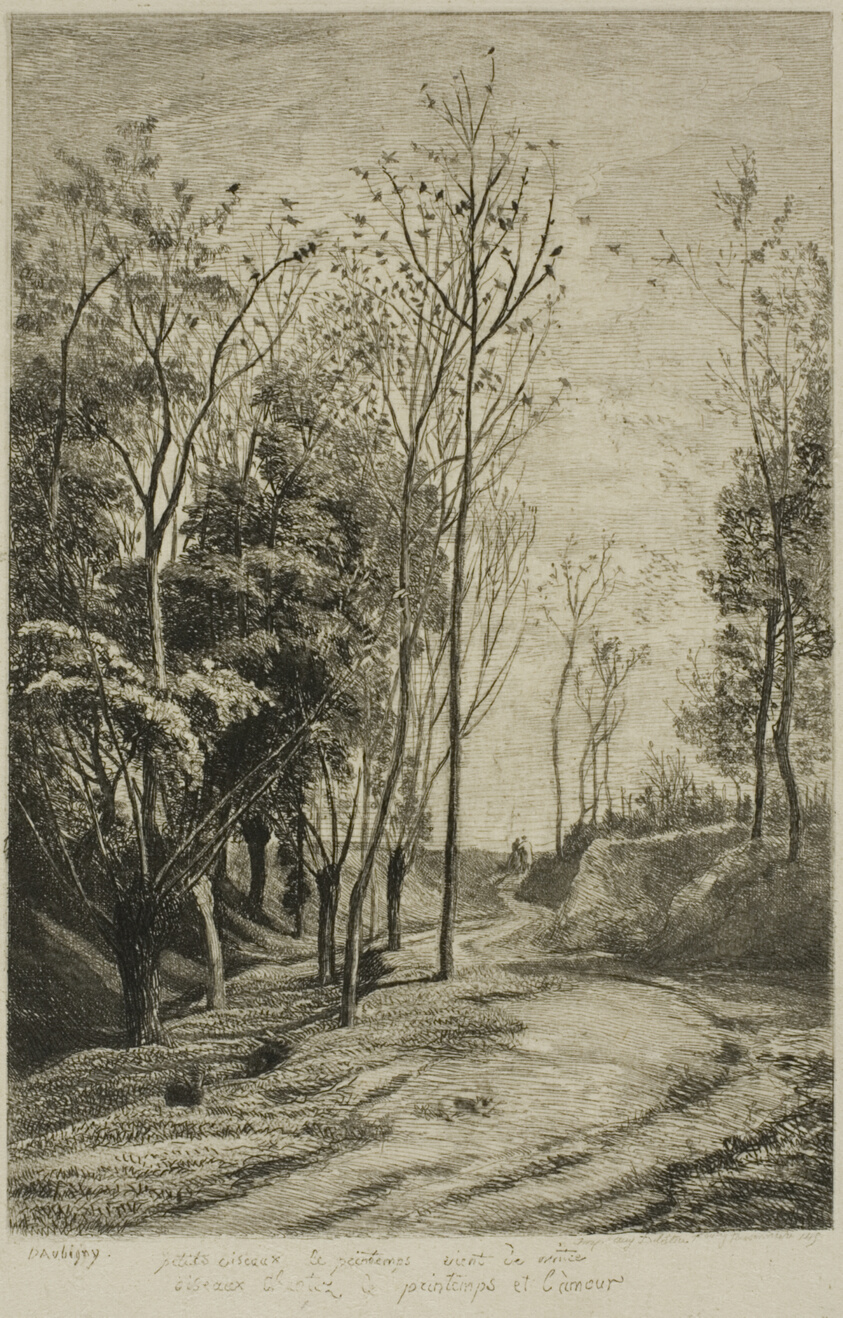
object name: Print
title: The Small Birds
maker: Charles François Daubigny (French, 1817-1878)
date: 1850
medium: Etching on ivory Japanese paper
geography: France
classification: etching; print; prints and drawing